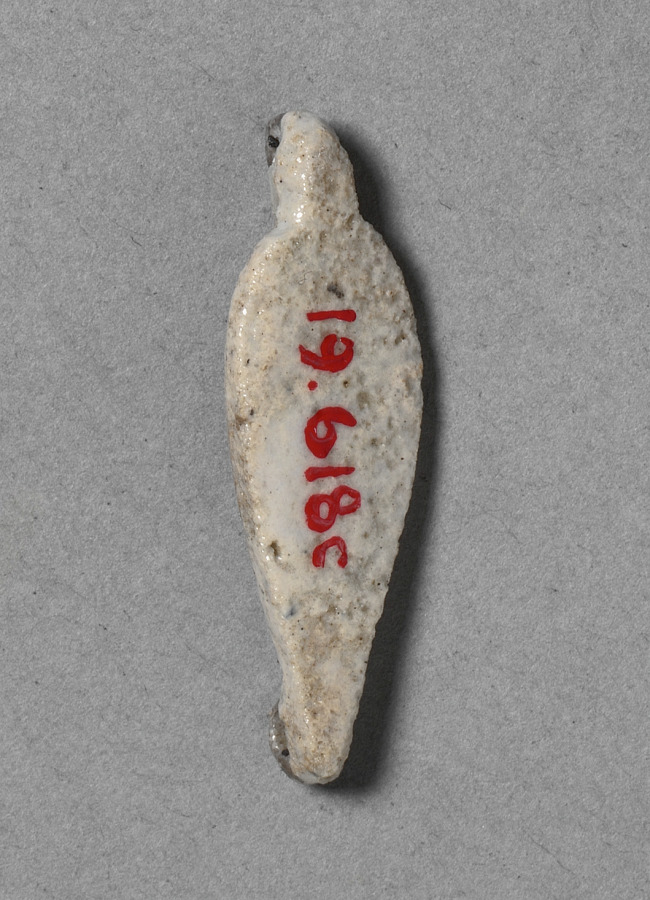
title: Petal-Shaped Bead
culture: Egypt, New Kingdom (1540–1069 BCE), Dynasty 18, reign of Amenhotep III (1390–1352 BCE)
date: c. 1391–1353 BCE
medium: faience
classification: Jewelry